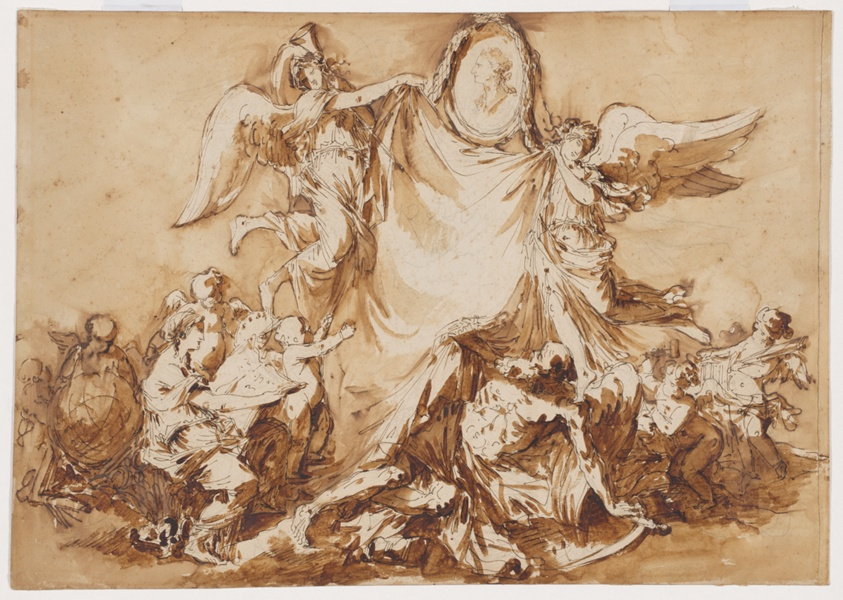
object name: Drawing and Watercolor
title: An Allegory of the Arts Vanquishing Time, Surmounted by a Medallion Portrait of King Stanislaw August of Poland as Patron of the Arts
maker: André Jean Lebrun (French, 1737–1811)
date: after 1780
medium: Pen and brown ink and brush and brown wash, over black chalk, on pieced ivory laid paper, laid down on ivory laid paper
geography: France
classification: drawings (visual works); chalk; brush and wash; pen and ink drawings; paper; prints and drawing